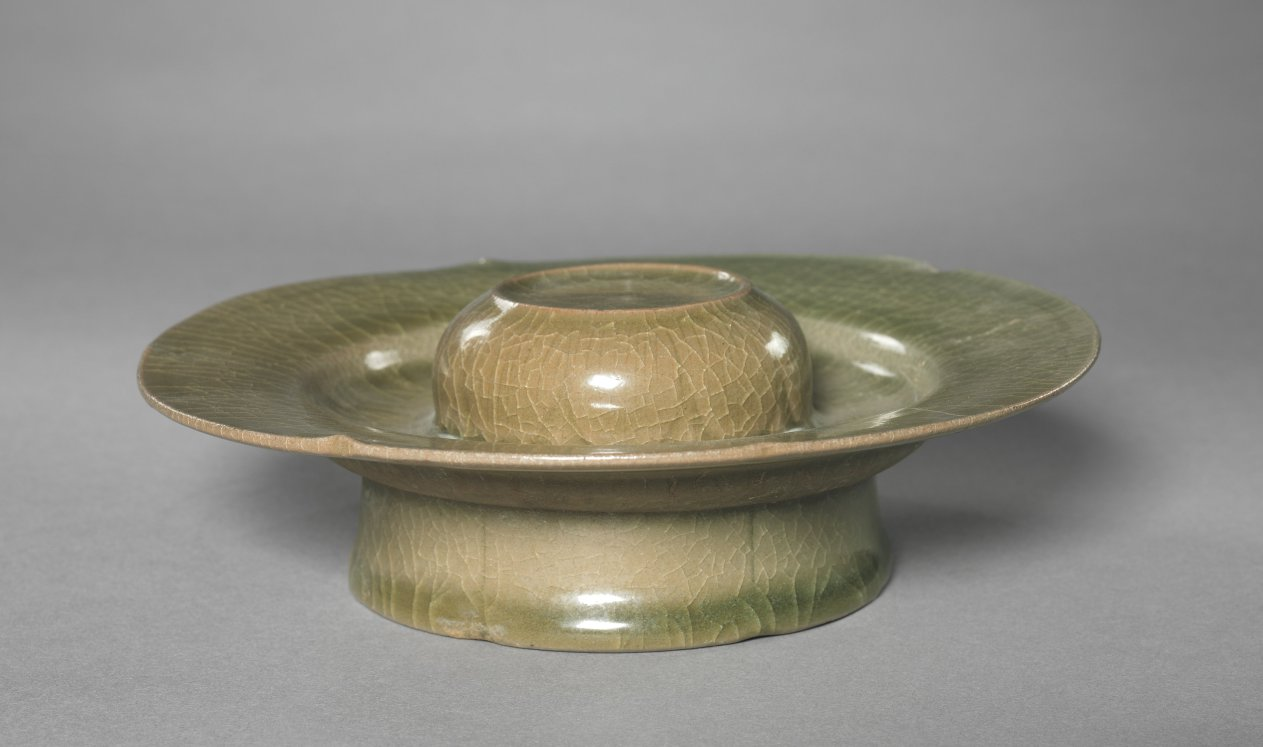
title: Floral-shaped Cup Stand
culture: Korea, Goryeo dynasty (918–1392)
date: 918–1392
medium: pottery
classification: Ceramic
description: As early as the 800s, the practice of drinking tea and wine became an important part of elite culture in Korea. Elites of the Goryeo period commissioned a variety of types of utensils and vessels including this delicate-looking cup stand, not only to make their drinking experience more exciting, but also to show their refined taste. This tea bowl must have been produced at one of the state-run kilns located in Kangjin, southern Jeolla province.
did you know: This cup stand is coupled with the cup (CMA 1921.616).